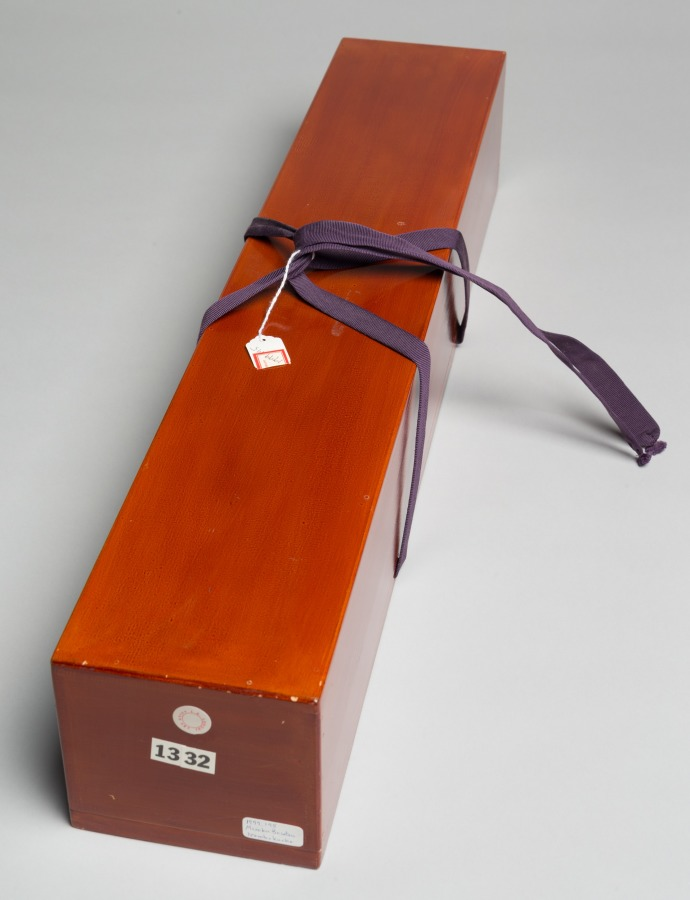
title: Miroku (Maitreya)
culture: Japan, Nanbokuchō period (1336–92)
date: 1300s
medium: Hanging scroll, ink, color, gold, and cut gold on silk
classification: Painting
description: In this image the figure of Miroku, Maitreya in Sanskrit, is richly adorned with gauzy fabrics, opulent jewels, and an intricate gold crown containing five seated Buddhas. Buddhist teachings say that Miroku will descend to Earth as a Buddha to restore Buddhist doctrine at the end of a long period of decline. Here he is represented as a bodhisattva, a being who has attained enlightenment but has chosen to postpone becoming a Buddha to help others reach enlightenment. Above the painting, three inscriptions present portions of a sacred text related to Miroku. A close look at the bodhisattva’s right side where fragile pigments have fallen away reveals writing on the back of the silk on which the image is painted— something its mounters never expected to be seen.